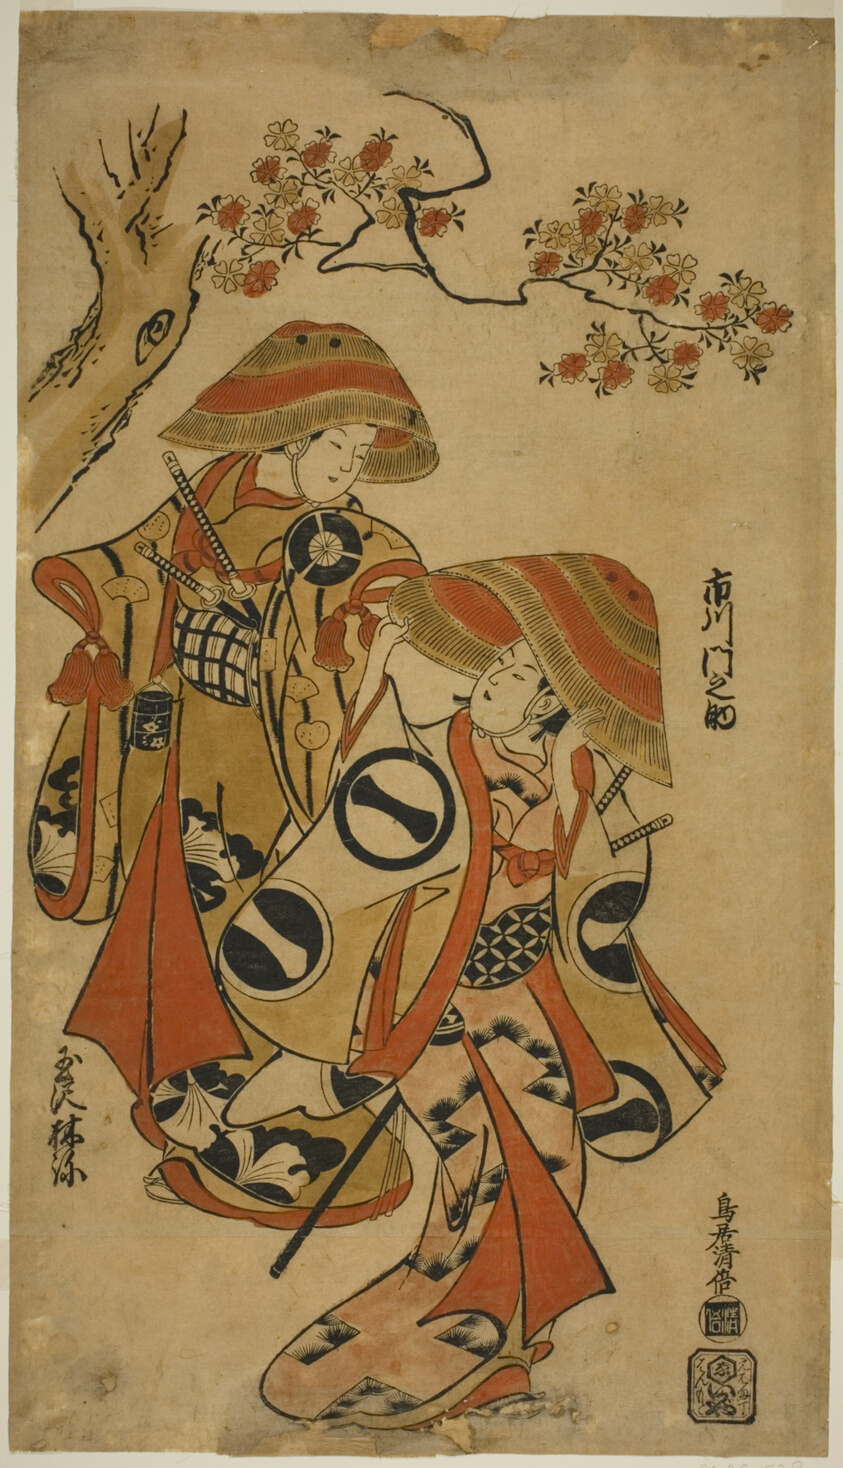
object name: Print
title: The Actors Ichikawa Monnosuke I and Tamazawa Rinya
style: Japanese (culture or style)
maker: Torii Kiyomasu I (Japanese, active c. 1704–18 (?))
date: c. 1715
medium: Hand-colored woodblock print; o-oban, tan-e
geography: Japan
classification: woodblock print; print; asian art